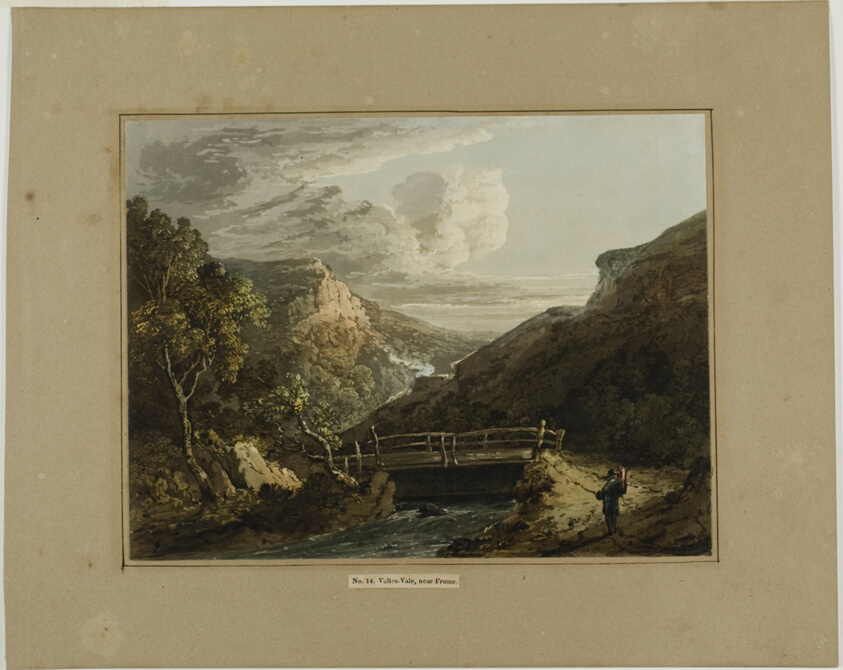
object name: Print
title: Valies-Vale, Near Frome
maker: Theodore Henry Fielding (English, 1781-1851); after Joseph Parker (American, 20th century)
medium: Aquatint on paper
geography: England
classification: aquatint; print; prints and drawing